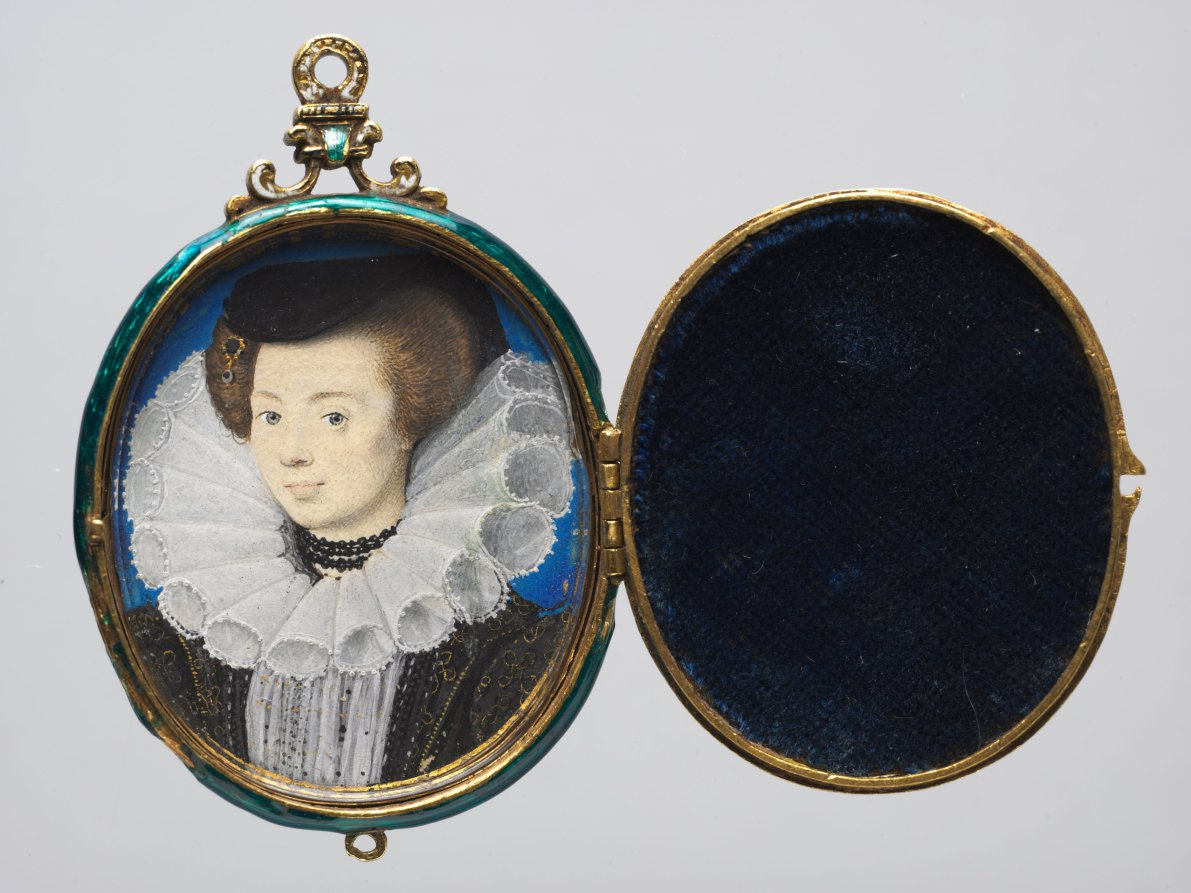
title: Portrait of a Woman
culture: England, 16th century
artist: Nicholas Hilliard (English, c. 1547–1619)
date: c. 1593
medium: watercolor on vellum in a gold and enamel locket frame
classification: Portrait Miniature